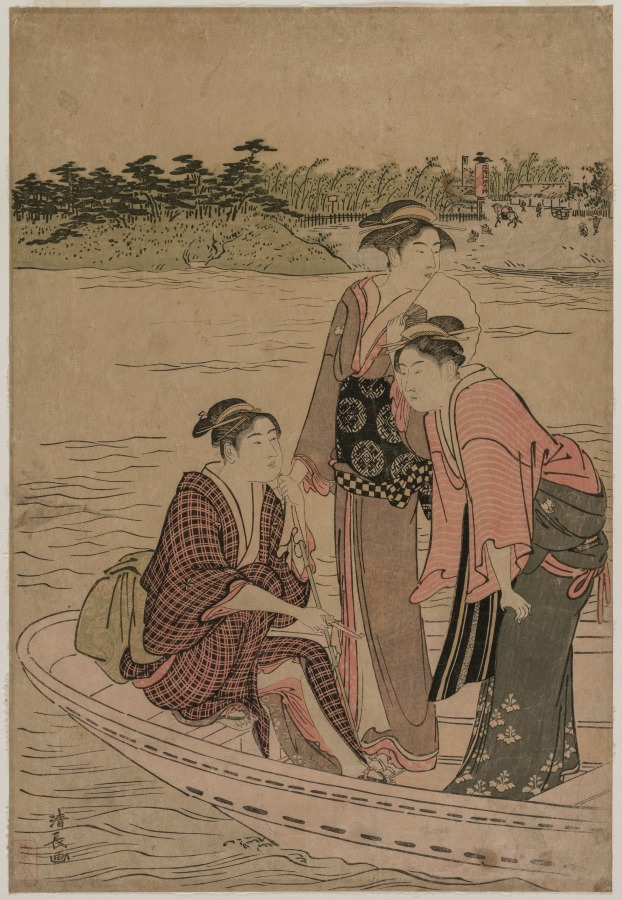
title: Passengers in a Ferry Boat on the Sumida River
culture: Japan, Edo period (1615–1868)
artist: Torii Kiyonaga (Japanese, 1752–1815)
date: 1784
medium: color woodblock print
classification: Print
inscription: Signature: Kiyonaga ga